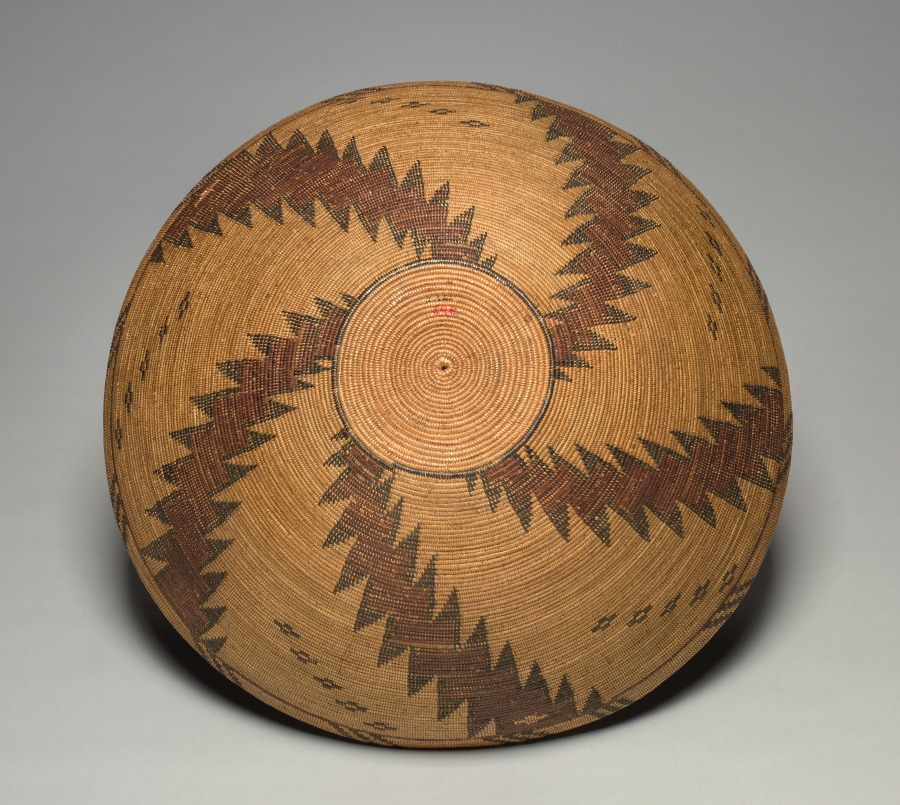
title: Presentation Bowl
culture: Native North America, Great Basin, California, Death Valley, Timbisha (Panamint) Shoshone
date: 1880–90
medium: devil's claw, sumac, yucca root, orange-shafted flicker (woodpecker) quills; coiled (2 rod and bundle of deer grass or basket grass)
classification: Basketry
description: This basket was made for the Euro-American collectors’ market in the early 1900s but it is modeled on basketry bowls from which the Timbisha (Panamint) Shoshone once served food. When used indigenously, the main view would have been of the interior. The two small, pink crosses, made of flicker (woodpecker) quills, may be a maker’s mark. Made-for-sale baskets testify to Indigenous women’s truly creative, resilient responses to forces that endangered their livelihoods and existence.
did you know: The two small, pink crosses on this basket may be a maker’s mark.